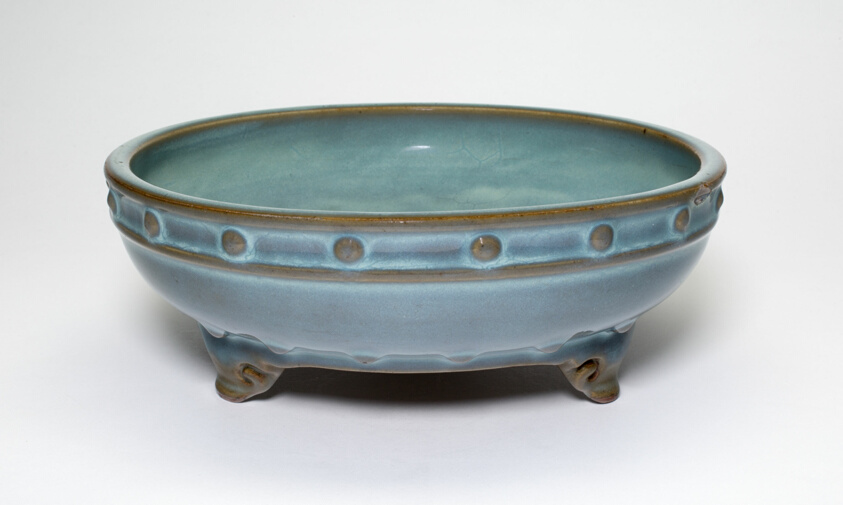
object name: Vessel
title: Circular Flowerpot Stand with Three Cloud-Shaped Feet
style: Chinese (culture or style)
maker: China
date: Jin dynasty (1115–1234), 13th century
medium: Jun ware; stoneware with light blue glaze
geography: China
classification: ceramics; asian art; vessel